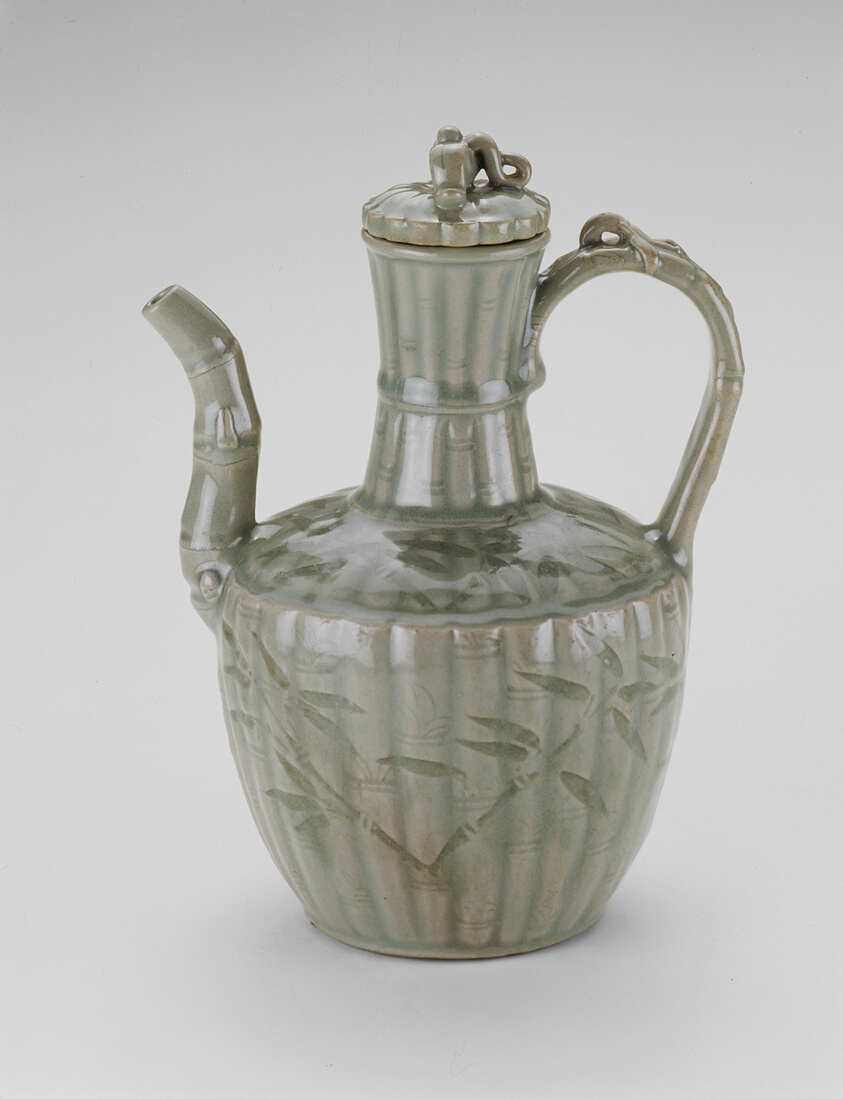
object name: Vessel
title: Ewer with Bamboo Fluting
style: Korean (culture or style)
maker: Korea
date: Goryeo dynasty (918–1392), early 13th century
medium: Stoneware with celadon glaze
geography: Korea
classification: ewer (vessel); stoneware; vessel; asian art; ceramics